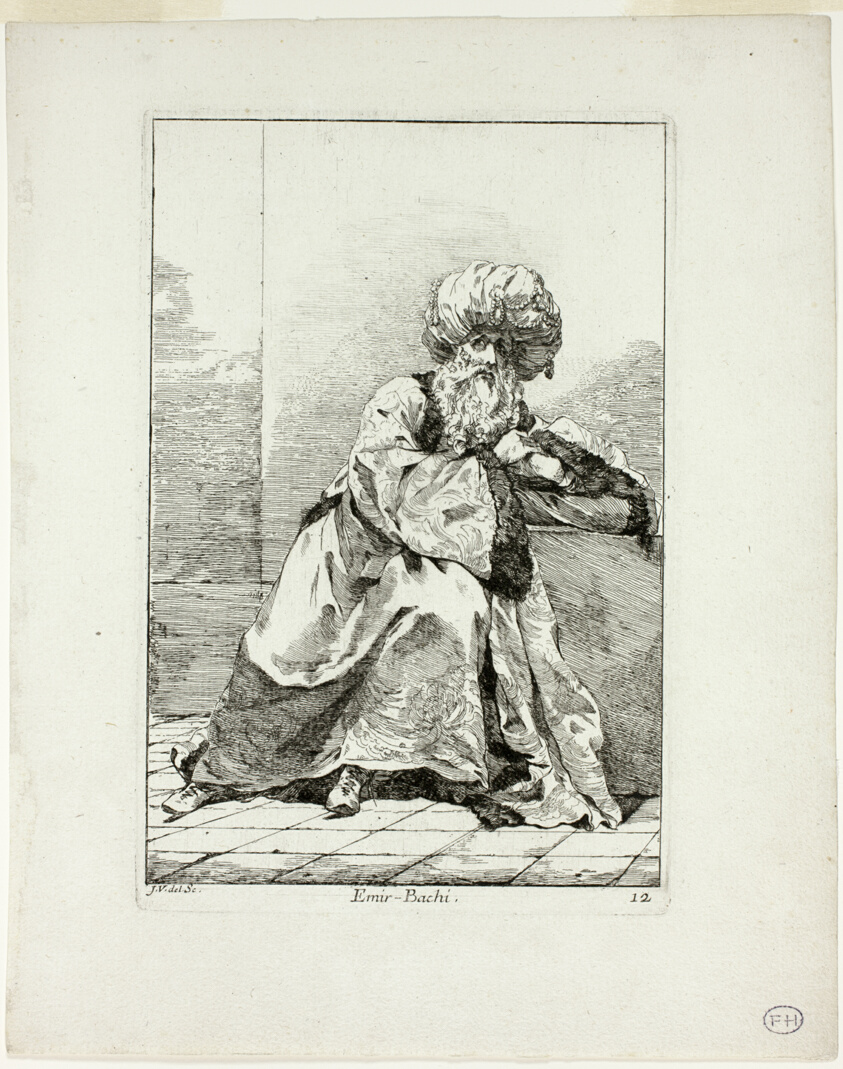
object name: Print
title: Emir Bachi, plate twelve from Caravanne du Sultan à la Mecque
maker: Joseph-Marie Vien, the elder; French, 1716–1809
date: 1748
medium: Etching on ivory laid paper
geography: France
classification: etching; paper; print; prints and drawing